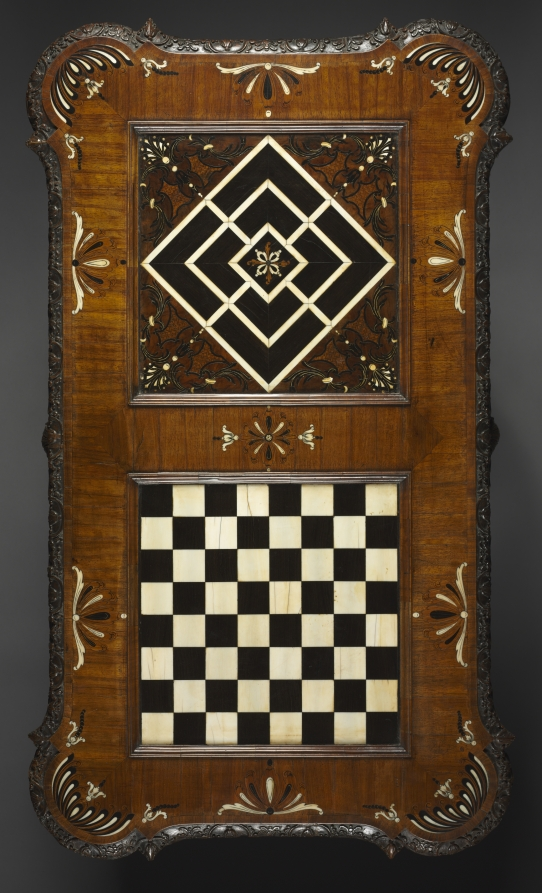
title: Gaming Table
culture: Germany, Mainz, 18th century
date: c. 1735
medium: wood and ivory marquetry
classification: Furniture and woodwork